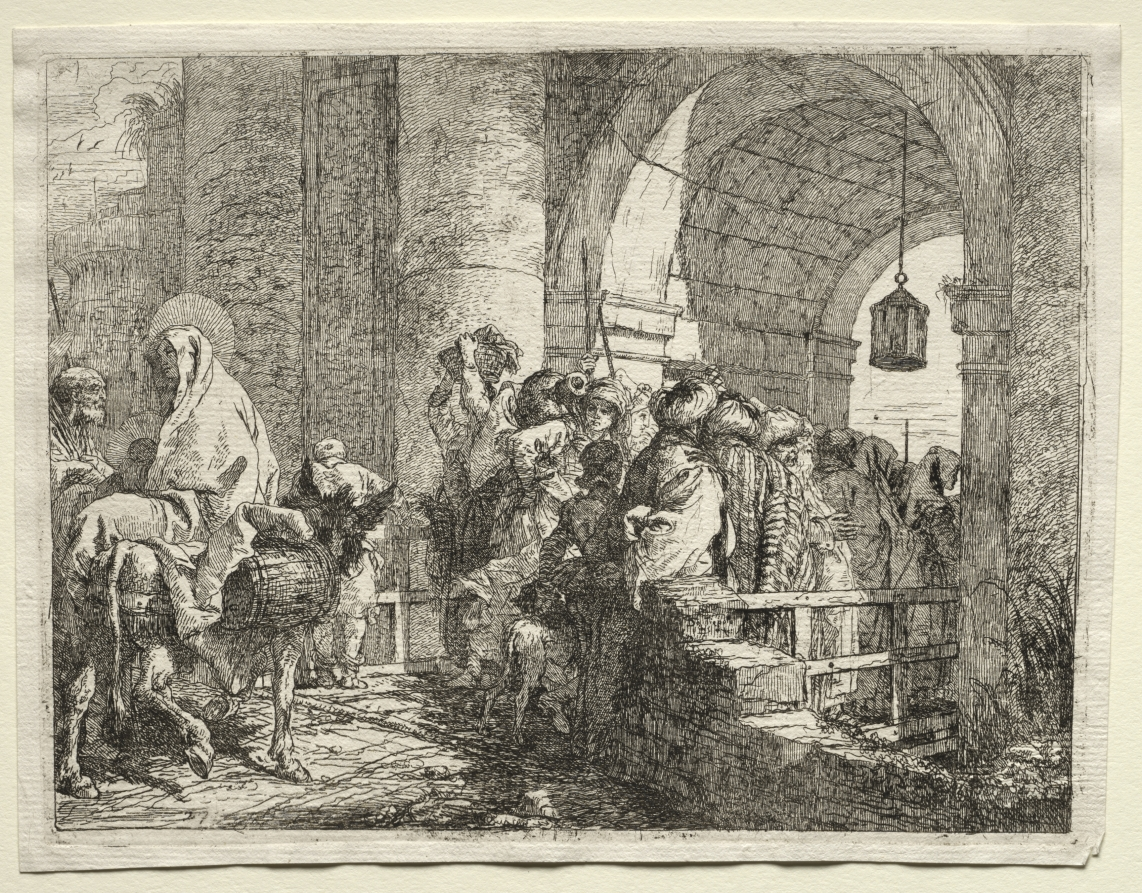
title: Flight into Egypt: The Holy Family Passing under an Arch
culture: Italy, 18th century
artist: Giovanni Domenico Tiepolo (Italian, 1727–1804)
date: 1750–53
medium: etching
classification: Print